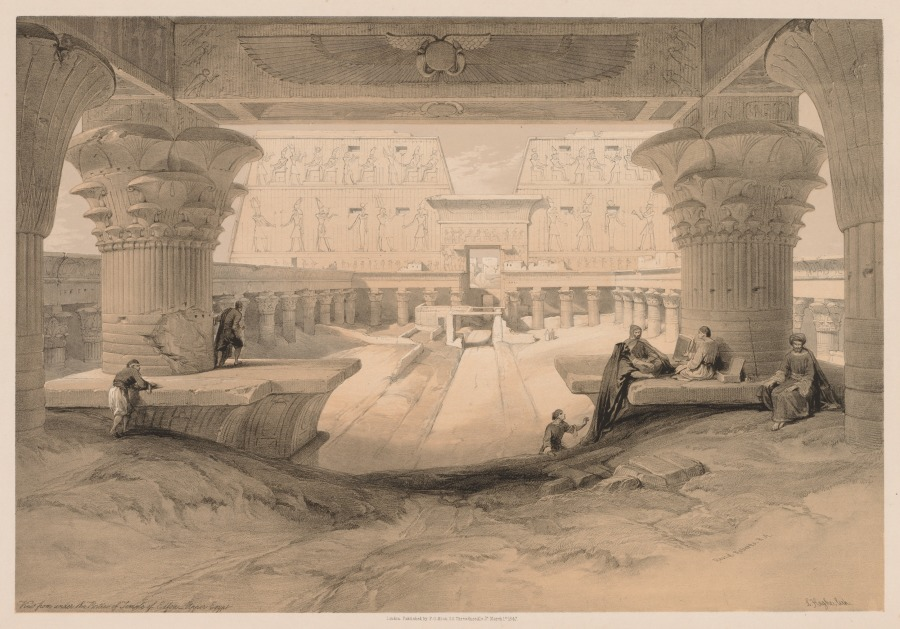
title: Egypt and Nubia: Volume I - No. 32, View from under the Portico of the Temple of Edfou, Upper Egypt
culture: England, 19th century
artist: Louis Haghe (British, 1806–1885)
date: 1838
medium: color lithograph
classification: Print